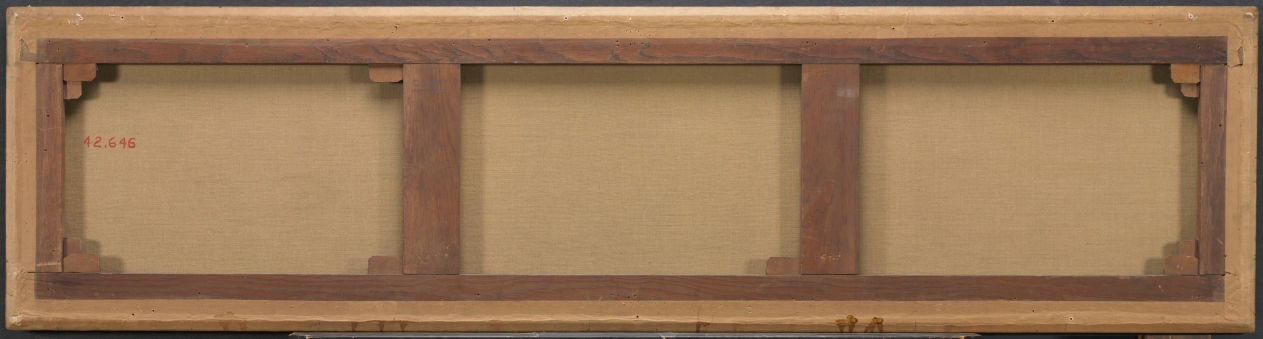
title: Tarquinius Priscus Entering Rome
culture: Italy, late 15th Century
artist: Jacopo del Sellaio (Italian, c. 1441–1493)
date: c. 1470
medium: tempera on wood, mounted on canvas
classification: Painting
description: Originally the front of a bridal chest, this panel was later removed and framed like a painting. At left, the Etruscan prophetess Tanaquil foresees her husband’s entry into Rome. En route, an eagle snatched his hat, then returned it as they approached the city, which Tanaquil interpreted as a good omen. Ancient triumphal processions, closely connected to ancient sarcophagi, were common subjects for bridal chests. Here Tanaquil is a model for a supportive, dutiful wife.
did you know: This painting utilizes continuous narrative; the same figures appear multiple times as the story unfolds from left to right.